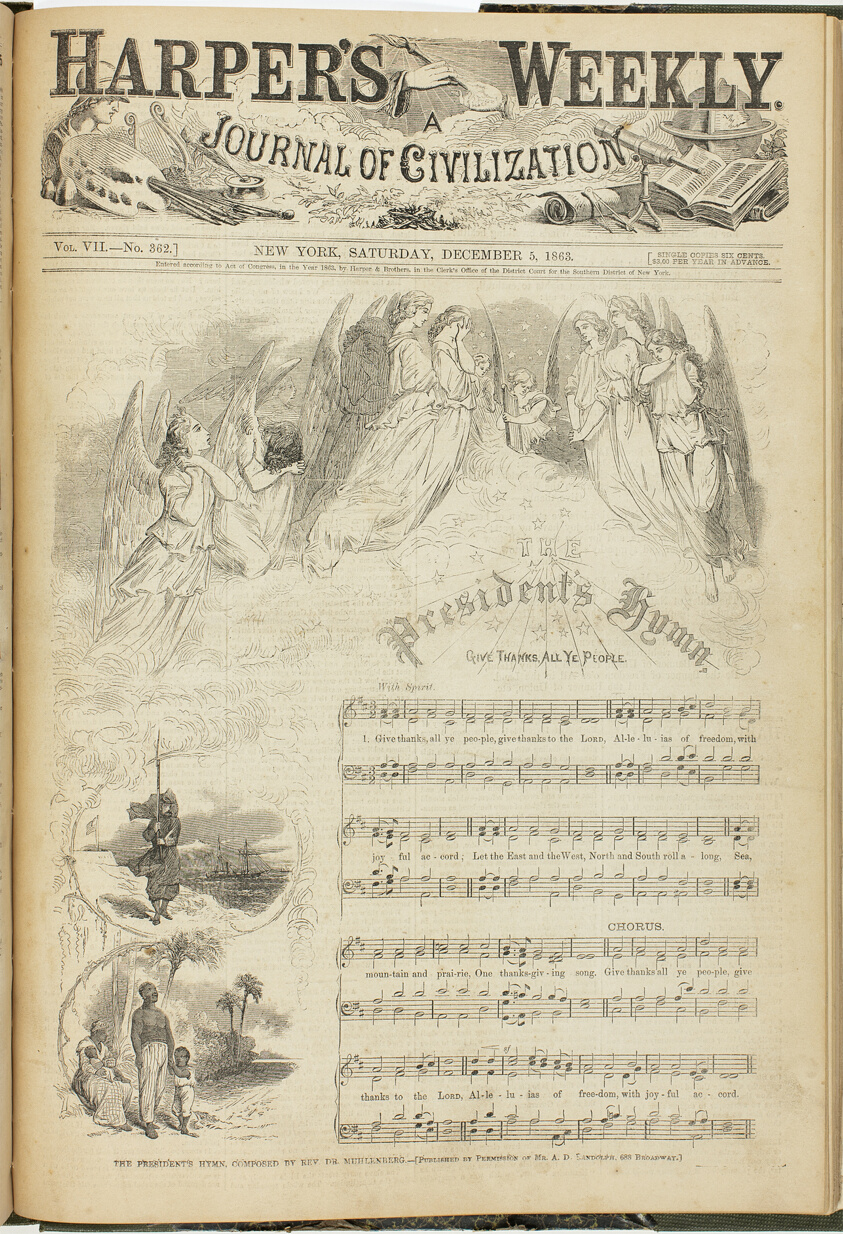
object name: Book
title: Harper's Weekly: A Journal of Civilization, Volume VII For the Year 1863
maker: published by Harper and Brothers (American, 1833-1942); Winslow Homer (American, 1836-1910); Thomas Nast (American, 1840-1902)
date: 1863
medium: Book with wood engravings in black on cream wove paper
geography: United States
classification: book; paper; prints and drawing